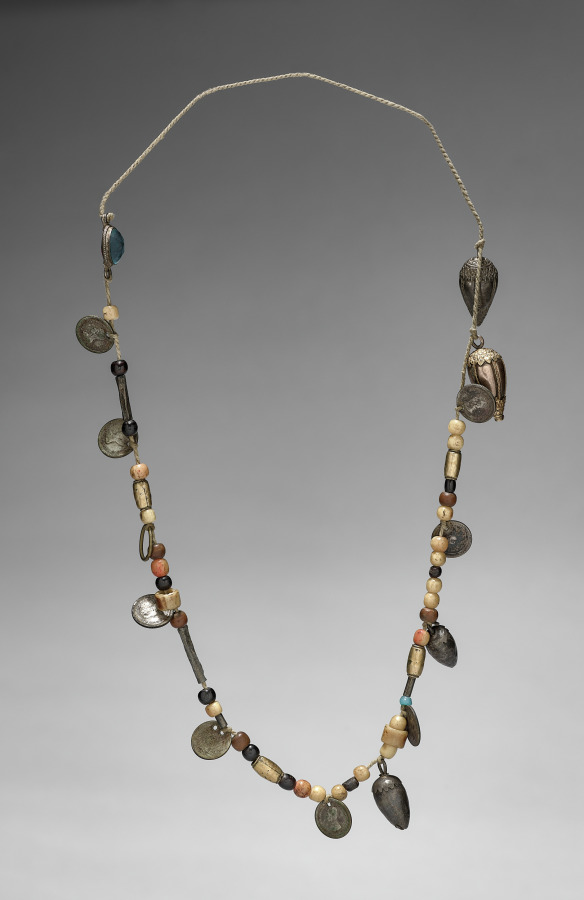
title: Necklace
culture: Siam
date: 1800s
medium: coins, bone, silver and gold beads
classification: Jewelry